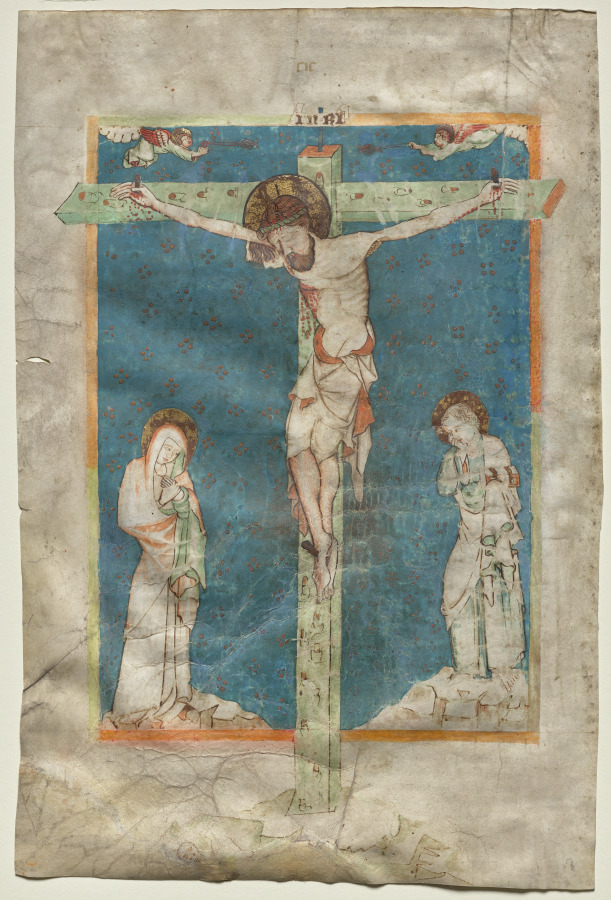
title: Leaf from a Missal: The Crucifixion (recto)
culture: Bohemia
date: c. 1330–40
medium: ink, tempera, and gold leaf on parchment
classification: Manuscript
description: The crucified Christ was a central theme of medieval visual art. Each period set its own artistic and iconographic priorities, depending on the function and context of the works. For example, the dead Christ with his head bowed, the side wound dripping with blood, and the richly designed loincloth is characteristic of the 1300s. This miniature is localized to Bohemia (present-day Czech Republic and Slovakia), with its capital, Prague, as a leading art center of its time. The great plague, however, does not seem to have triggered a surge of innovation here.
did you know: Below the cross a small skull is visible, Golgotha the site of the crucifixion was often translated as "place of the skull."